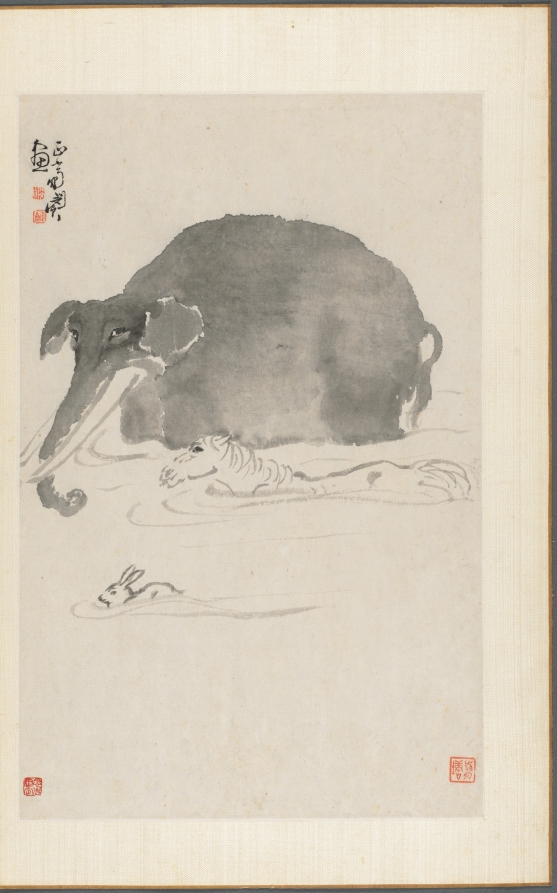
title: Elephant, Horse, and Hare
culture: China, Qing dynasty (1644-1911)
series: Album of Miscellaneous Subjects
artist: Min Zhen (Chinese, 1730–after 1788)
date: 1788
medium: album leaf, ink on paper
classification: Painting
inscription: Six seals appearing on the leaves: Min Zhen 閔貞; Zheng zhai 正齋; Qingqiao 青橋; Zhen 貞; Liao tang 蓼塘; Min Zhen zhi yin 閔貞之印。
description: Min Zhen, who was orphaned at age 12 and developed an eccentric personality, was trained by Tang Yin (1682–1756), a writer, playwright, and superintendent of the imperial porcelain workshops in Jingdezhen. The connection to him may have enabled Min to stay in Beijing for a decade from around 1773. It is not clear whether he ever resided in Yangzhou, but his style is in many instances reminiscent of that of Yangzhou artist Huang Shen. The album was painted for the artist's friend Dailili Shanren in exchange for a scholar’s stone. The paintings demonstrate Min Zhen’s versatility and mature style in the last years of his life. This leaf, Elephant, Horse, and Hare, seems to exhibit a contest, and may be associated with the recipient’s affinity to Buddhism (elephant), Confucianism (horse), and Daoism (hare).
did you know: The artist might have seen an elephant in the imperial zoo when he worked in Beijing from 1773 to 1784.